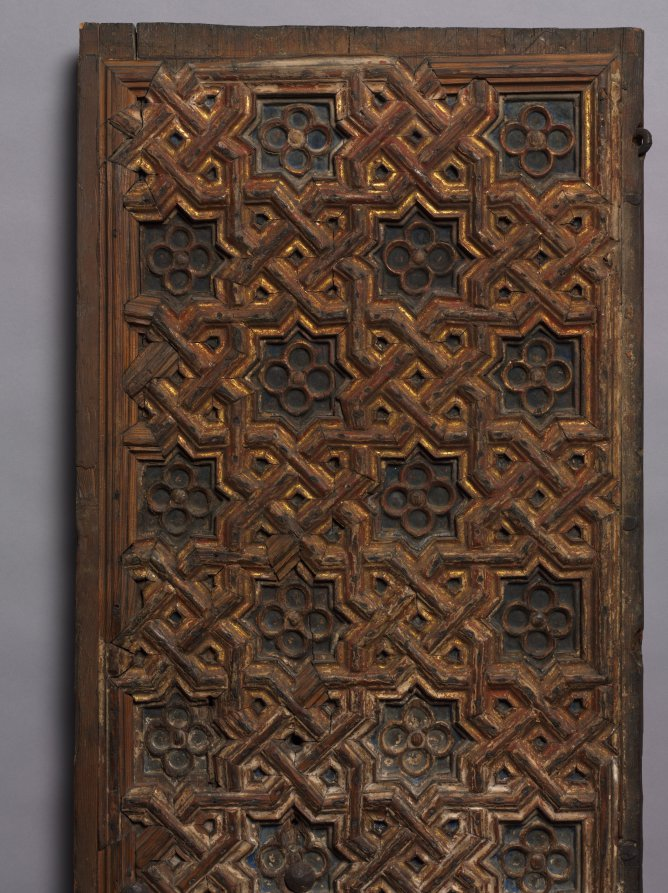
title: Door (right)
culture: Spain, early 15th century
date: early 1400s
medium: gilded and painted wood (pine)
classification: Furniture and woodwork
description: Typical of Muslim-inspired ornamentation, these doors reflect a love of geometric decoration stemming from a nonrealistic artistic tradition. They consist of applied wood strips that form eight-point stars, flowers, and geometric interlace designs. Such designs are reflected in the tiles, ceramic vessels, and metalwork of Muslim-occupied Spain. The origin of the doors is not known, but they may have belonged to a palace or domestic residence. In 711 the Moors had invaded and conquered nearly the entire peninsula. During the next 750 years, independent Muslim states were established, and the entire area of Muslim control became known as Al-Andalus. Muslim philosophers and scientists developed knowledge in areas like medicine, optics, algebra, chemistry, and geometry, as seen here.